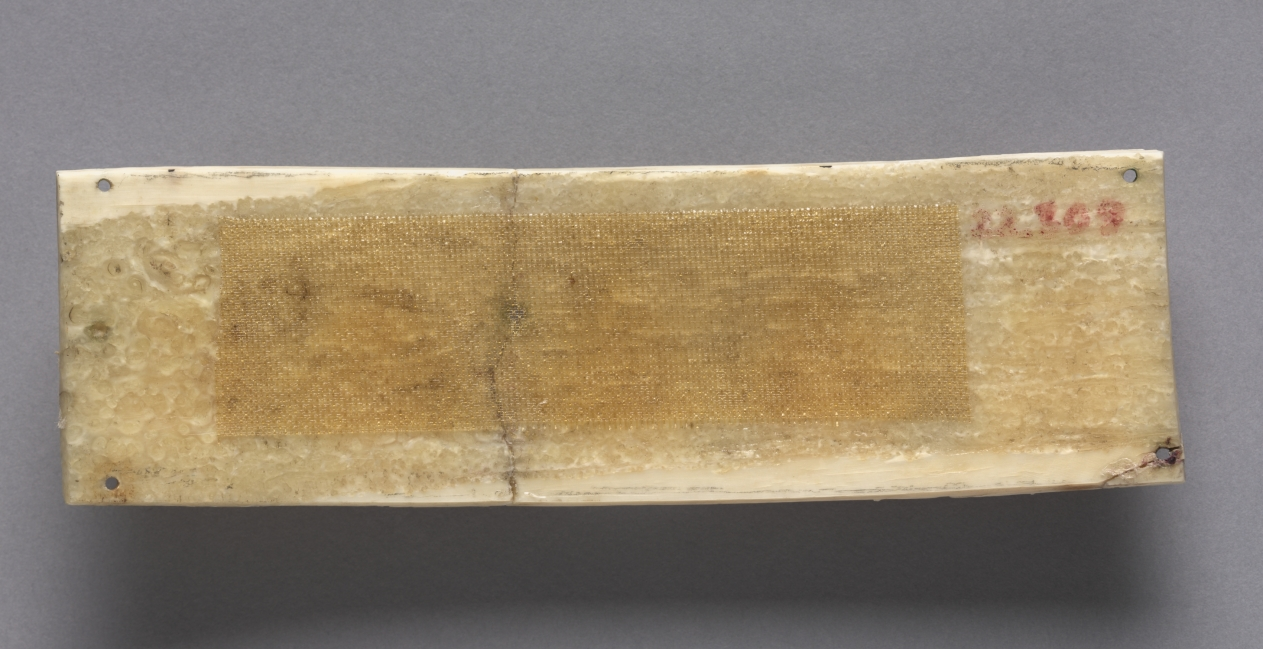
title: Plaque from a Portable Altar Showing Christ and the Apostles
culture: Germany, Lower Rhine Valley, Romanesque period, 11th century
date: 1050–1100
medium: walrus ivory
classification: Ivory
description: This intricately carved ivory panel once decorated the side of a portable altar. One of three plaques, it depicts Christ's apostles and was one of the first major acquisitions of William M. Milliken, the museum's first curator of decorative arts and later director (1930–1958). As Milliken later recalled, the pieces "were immensely intriguing, monumental in scale, even if tiny in size, the Christ in the mandorla could have been enlarged and would have graced the tympanum of a great cathedral."